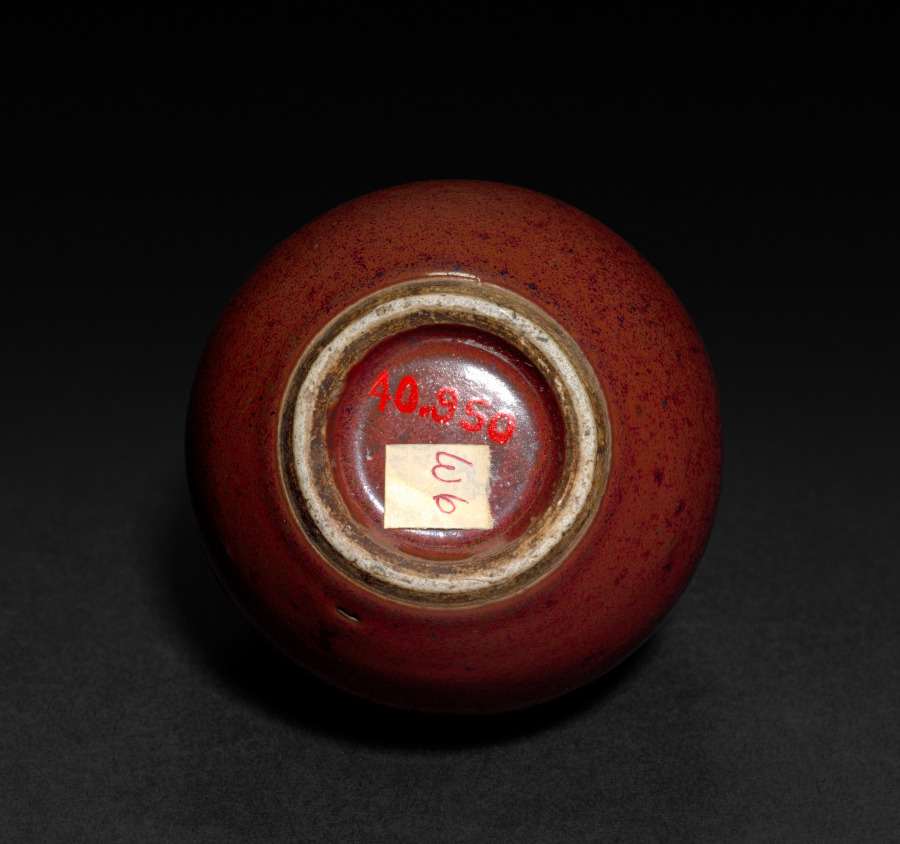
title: Jar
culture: China, Qing dynasty (1644–1911), Qianlong reign (1736–95)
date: 1736–95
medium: porcelain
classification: Ceramic